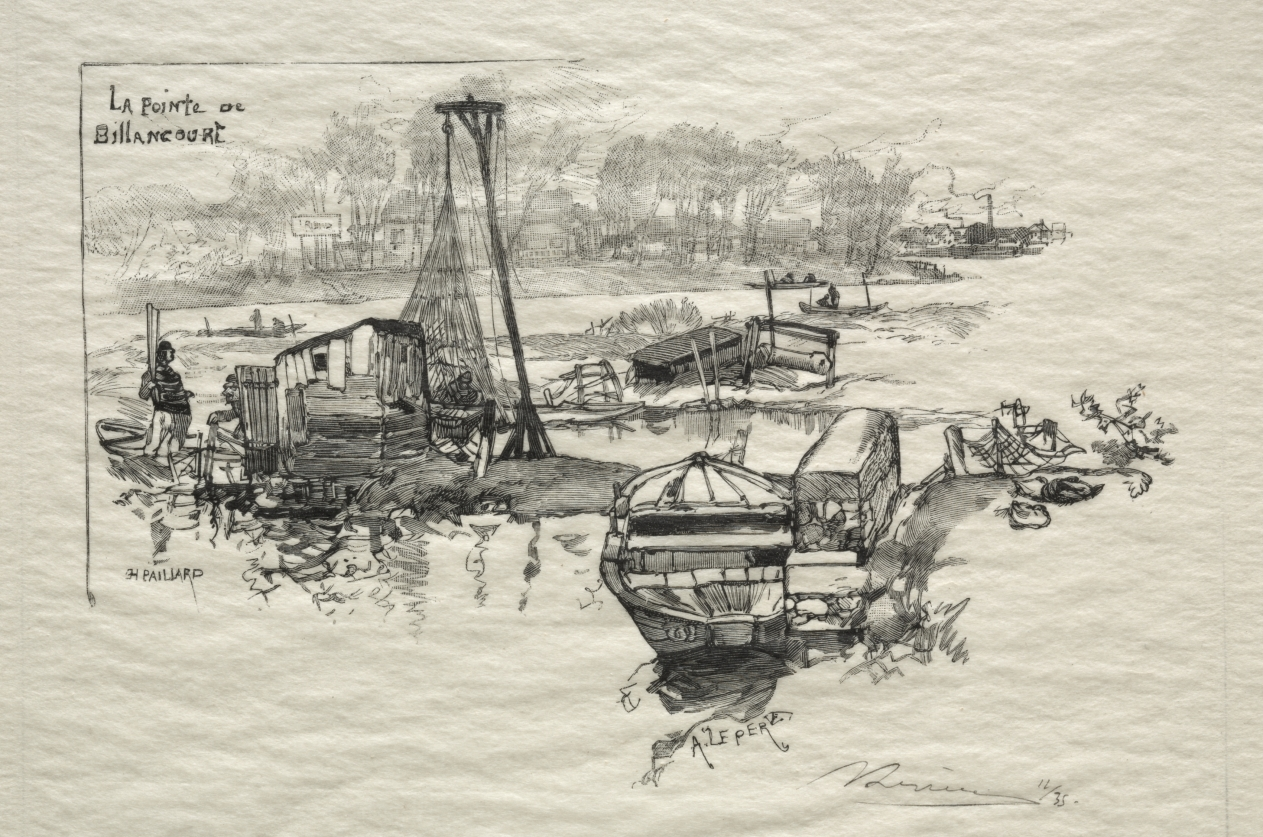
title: Le Point de Billancourt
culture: France, 19th-20th century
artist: Auguste Louis Lepère (French, 1849–1918)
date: 1886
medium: wood engraving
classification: Print